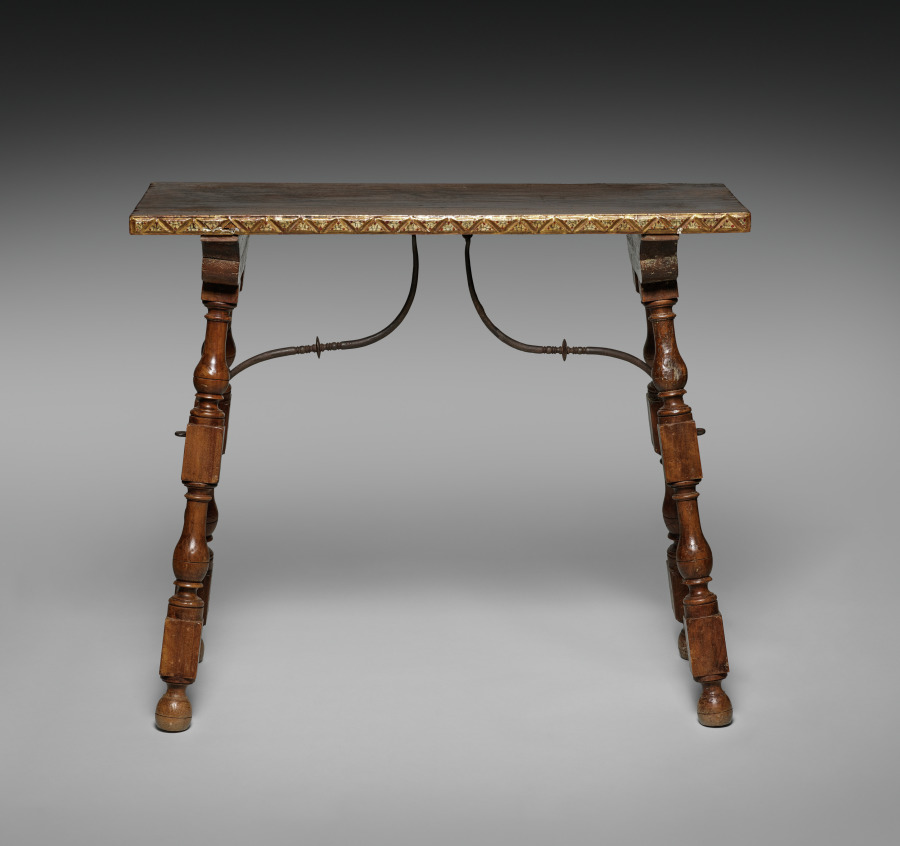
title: Chest (Base)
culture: Spain, Colonial, late 17th Century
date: late 1600s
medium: turned and joined wood with wrought iron hardware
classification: Furniture and woodwork